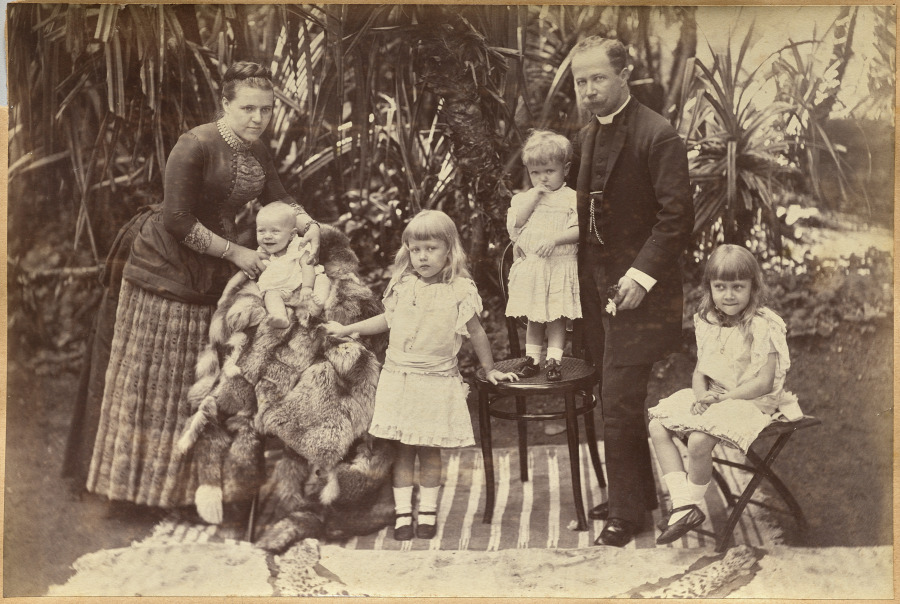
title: Untitled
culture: India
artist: Raja Deen Dayal (Indian, 1844–1905)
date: c. 1882–87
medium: albumen print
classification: Photograph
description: These photographs are part of an album, now disassembled, of around 105 photographs taken in India between 1885 and summer 1887 that provide glimpses into the lives of the British colonial elite and royal and upper-class Indians. The museum holds another group of 37 pictures from this album (2016.266), which was probably commissioned by a British civil servant visiting or working in India around 1888 as a personal souvenir of his experiences there.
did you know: Raja Deen Dayal is regarded now, and was considered during his lifetime, to be India’s most important 19th-century photographer.